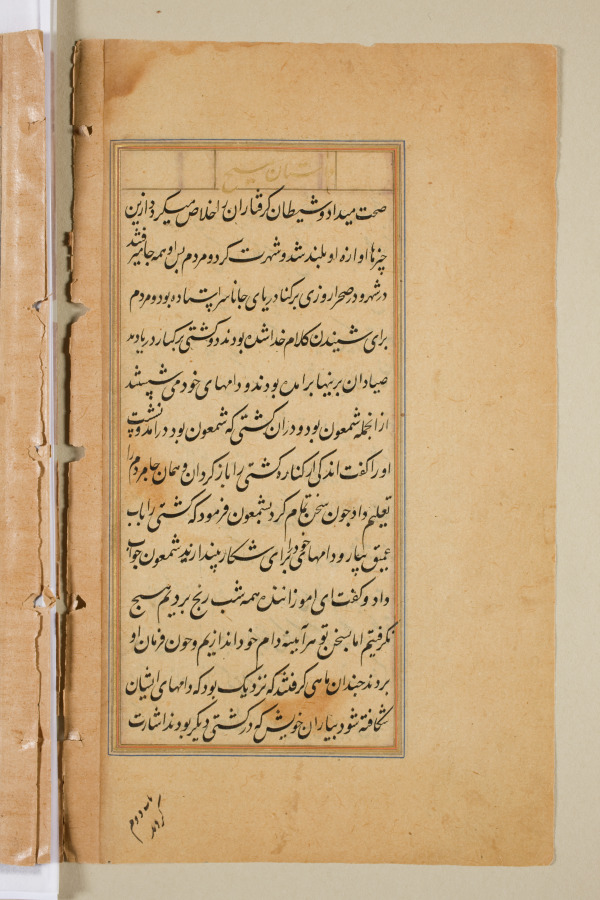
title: Text page from a Mirror of Holiness (Mir’at al-quds) of Father Jerome Xavier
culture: Mughal India, Allahabad, made for Prince Salim (1569–1627)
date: 1602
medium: Ink and gold on paper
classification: Manuscript